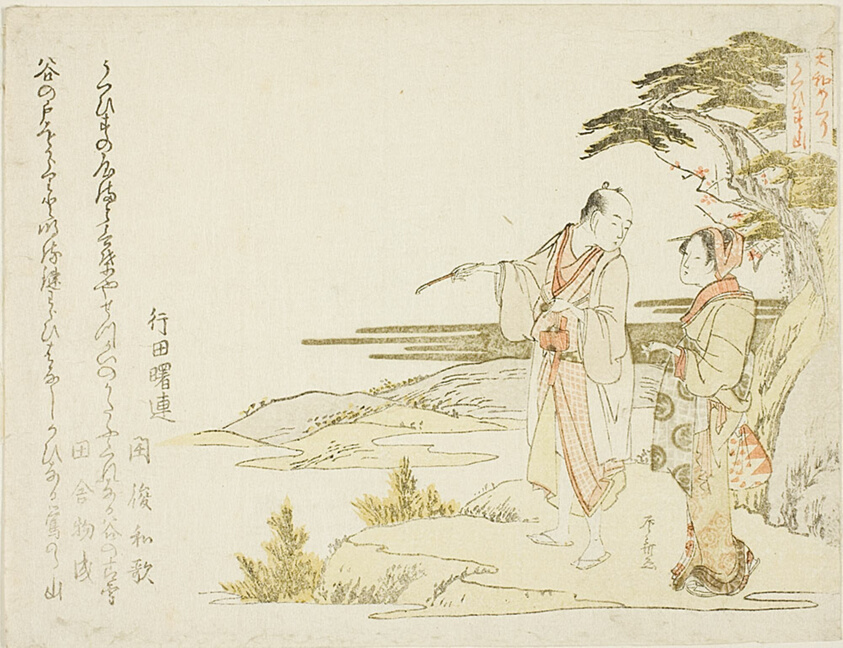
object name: Print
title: A Couple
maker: Ryuryukyo Shinsai (Japanese, c. 1764-1820)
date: early 19th century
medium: Color woodblock print; surimono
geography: Japan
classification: woodblock print; print; asian art